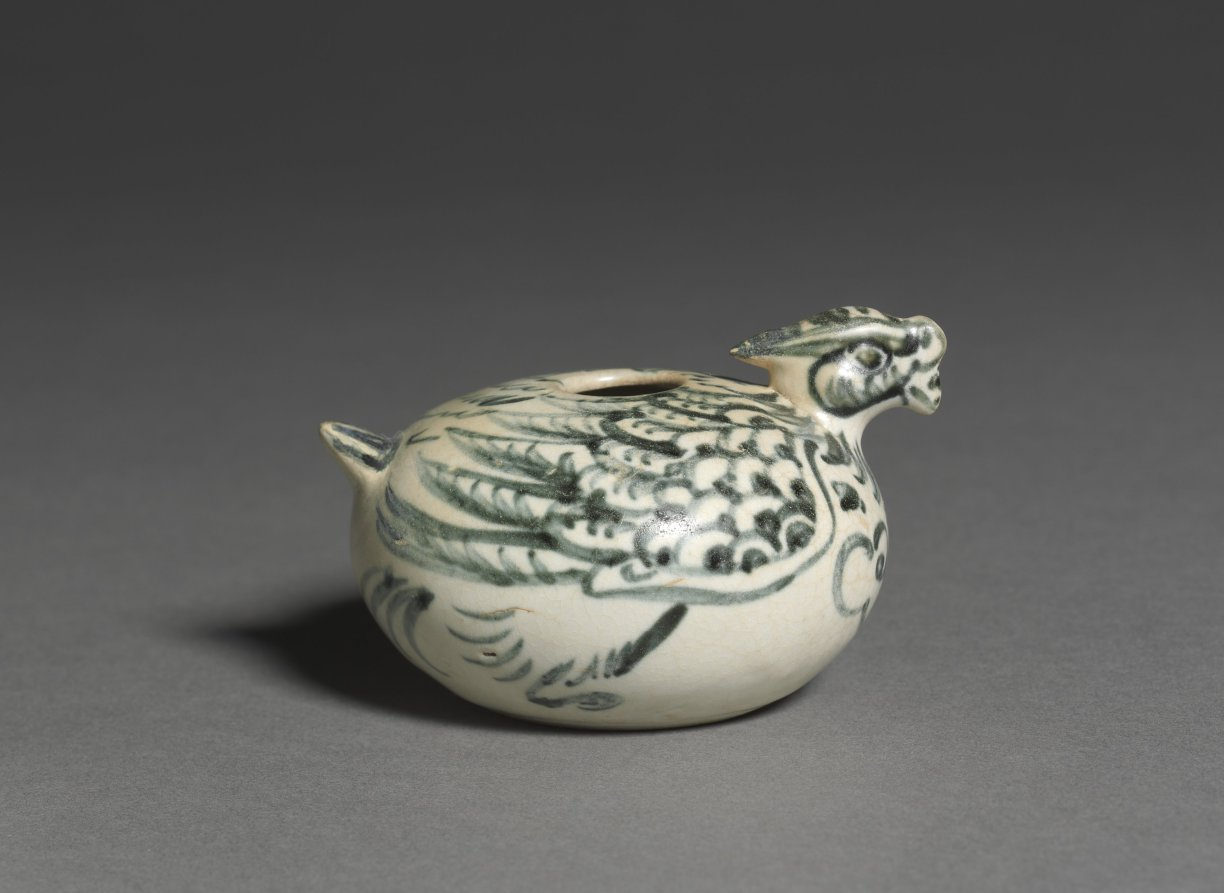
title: Bird-Shaped Jar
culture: Vietnam (Annam)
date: 1400s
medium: porcelain with underglaze blue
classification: Ceramic